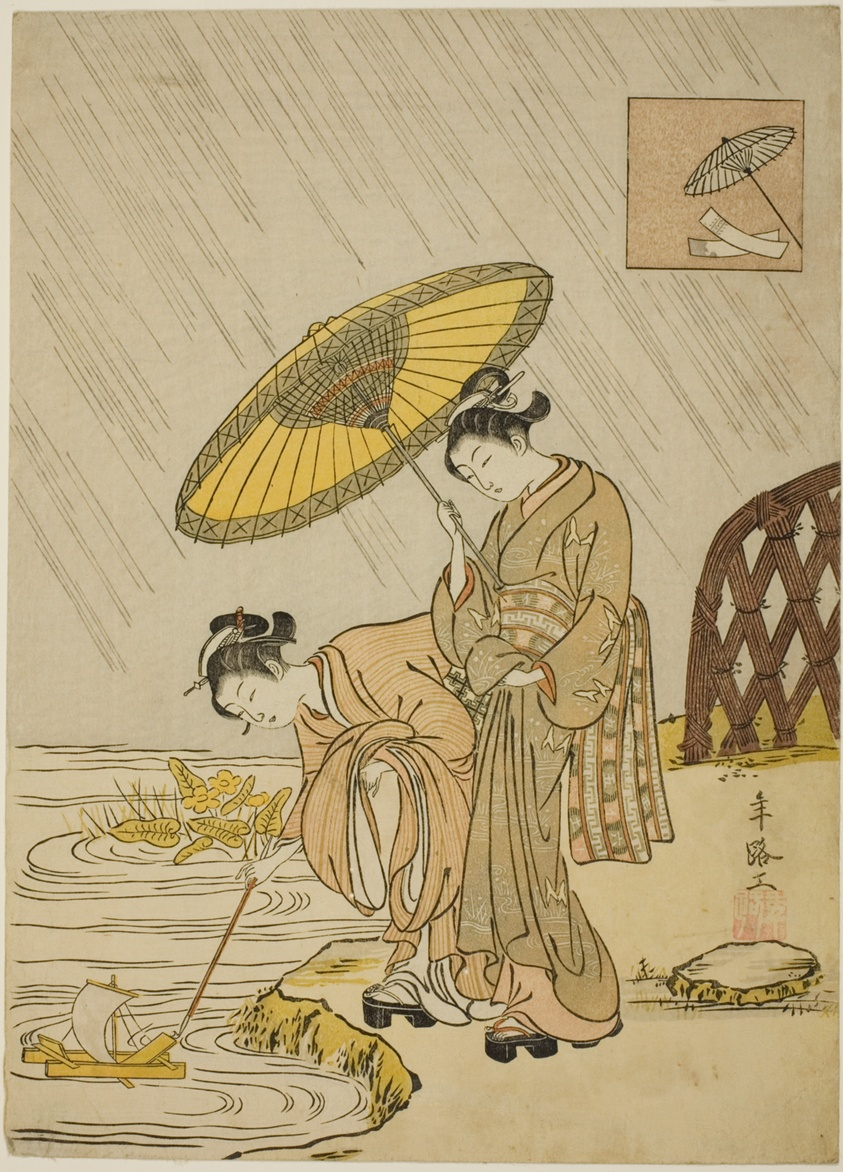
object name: Print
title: Ono no Komachi Praying for Rain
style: Japanese (culture or style)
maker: Attributed to Suzuki Harunobu 鈴木 春信; Japanese, 1725 (?)-1770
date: Edo period (1615–1868), 1766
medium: Color woodblock print; chuban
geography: Japan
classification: woodblock print; print; asian art